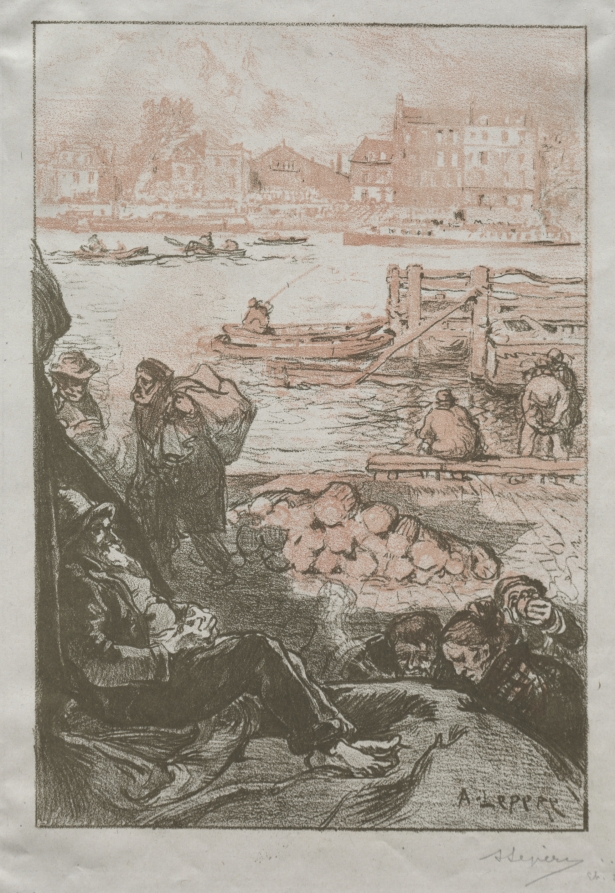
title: The River Porter, Monday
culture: France, late 19th Century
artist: Auguste Louis Lepère (French, 1849–1918)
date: 1897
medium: lithograph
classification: Print